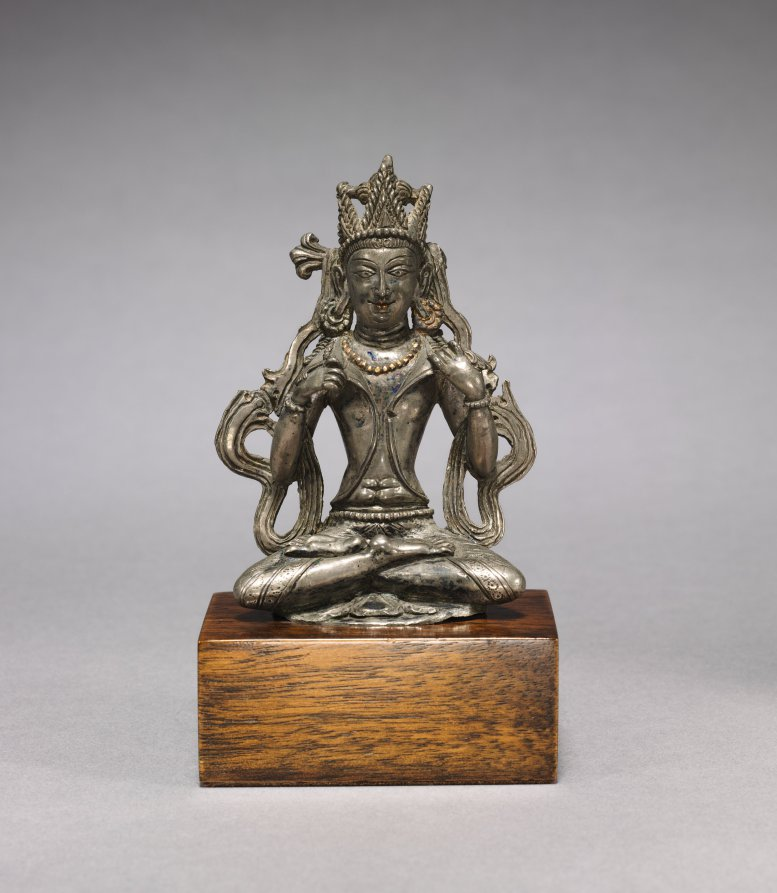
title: Bodhisattva Vajraraksha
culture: Western Tibet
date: c. 900s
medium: silver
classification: Sculpture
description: Once part of a set of sculptures depicting the enlightened beings who occupy a perfect world called the Diamond Realm (Vajradhatu), this figure holds the collar of his jacket in a gesture specific to him. An important practice in Tibetan Buddhism is the visualization of the Diamond Realm as described in texts and aided by artistic representations called mandalas. Bodhisattva Vajraraksha sits in the northern quadrant as a subsidiary figure to the Buddha Amoghasiddhi, who is green in color and quells fear.